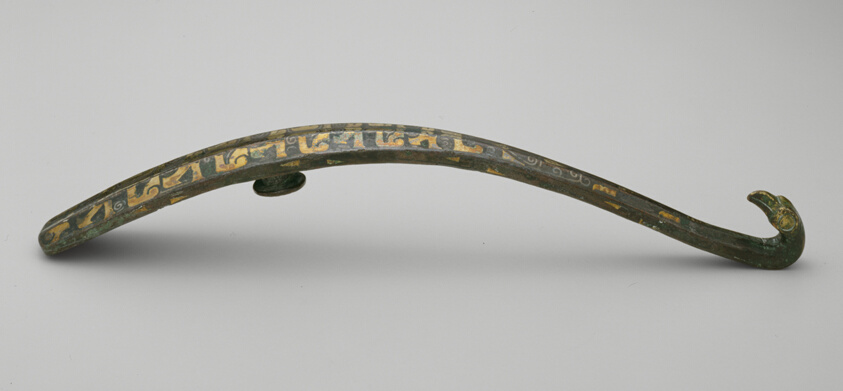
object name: Decorative Arts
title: Garment Hook (Daigou)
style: Chinese (culture or style)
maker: China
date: Eastern Zhou dynasty, Warring States period (480–221 B.C.), 3rd/2nd century B.C.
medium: Bronze inlaid with gold and silver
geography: China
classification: bronze; metal; decorative object/ornament; asian art; decorative arts